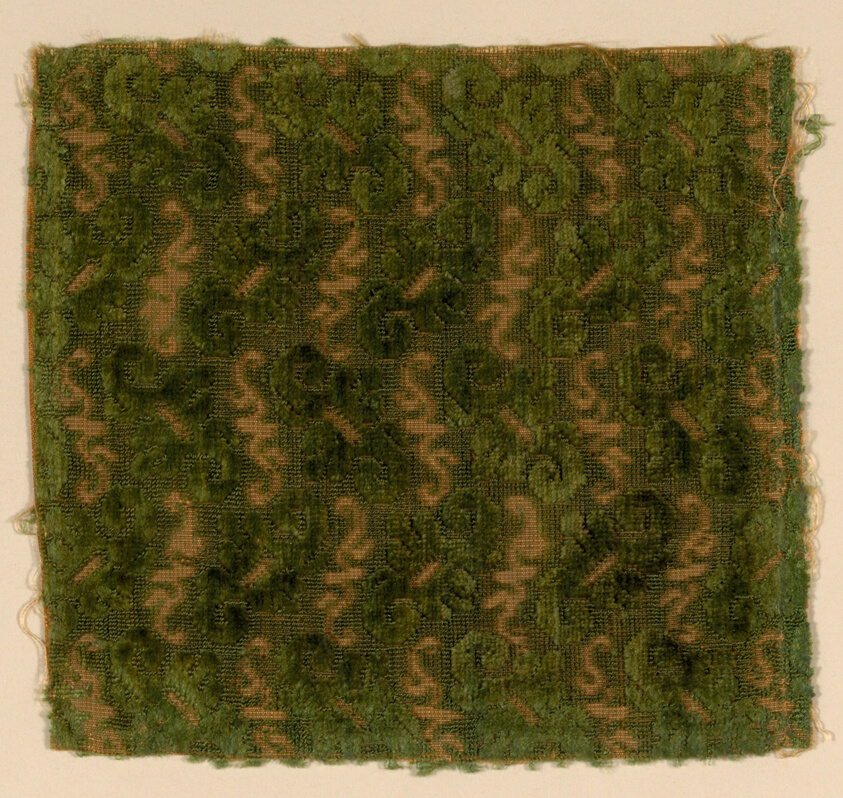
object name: Textile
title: Fragment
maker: Italy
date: 1601/50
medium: Silk, plain weave with supplementary pile warps forming cut and uncut voided velvet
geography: Italy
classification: textile; weaving - velvet; weaving